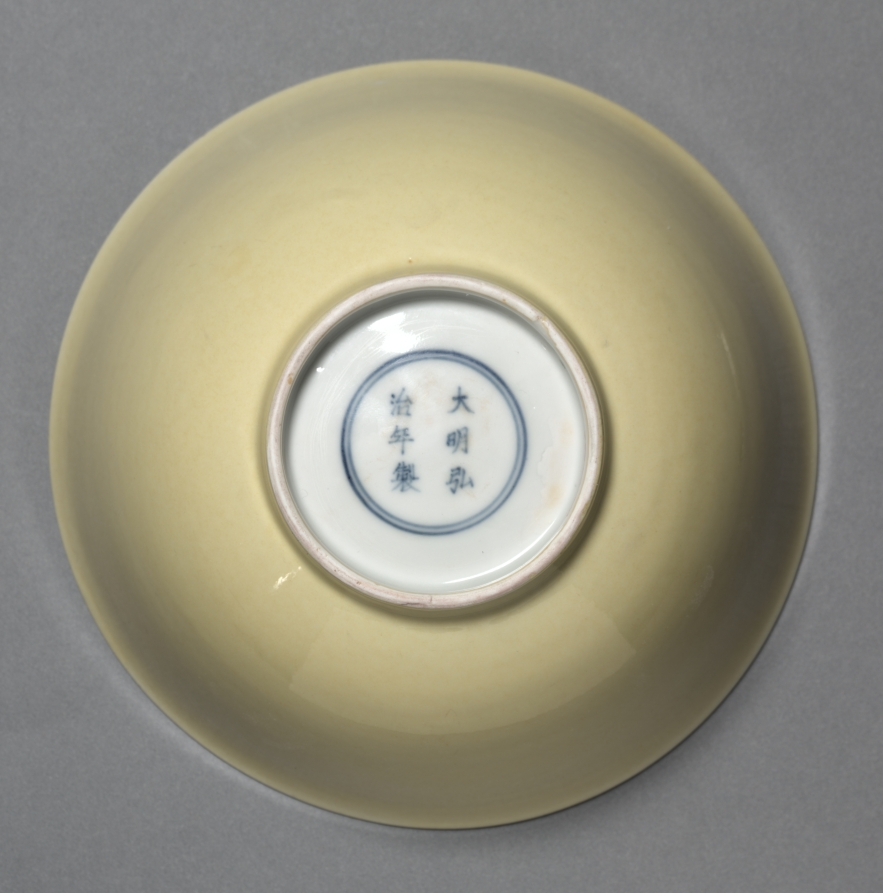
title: Bowl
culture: China, Jiangxi province, Jingdezhen, Ming dynasty (1368–1644), Hongzhi mark and period (1488–1505)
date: 1488–1505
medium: porcelain with yellow glaze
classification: Ceramic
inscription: 大明弘治年制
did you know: The six-character inscription on the base reveals this deep bowl was made during the reign of the Hongzhi emperor.